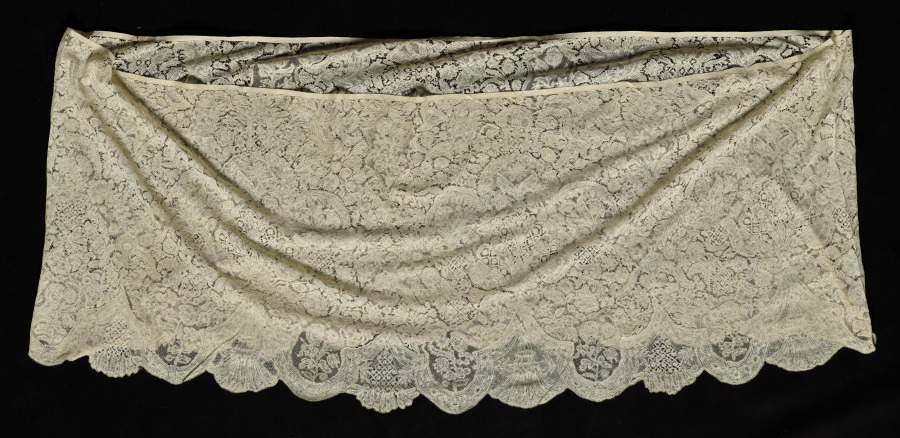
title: Lace Flounce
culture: Belgium, Brussels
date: 1700s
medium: Linen: bobbin lace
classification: Lace